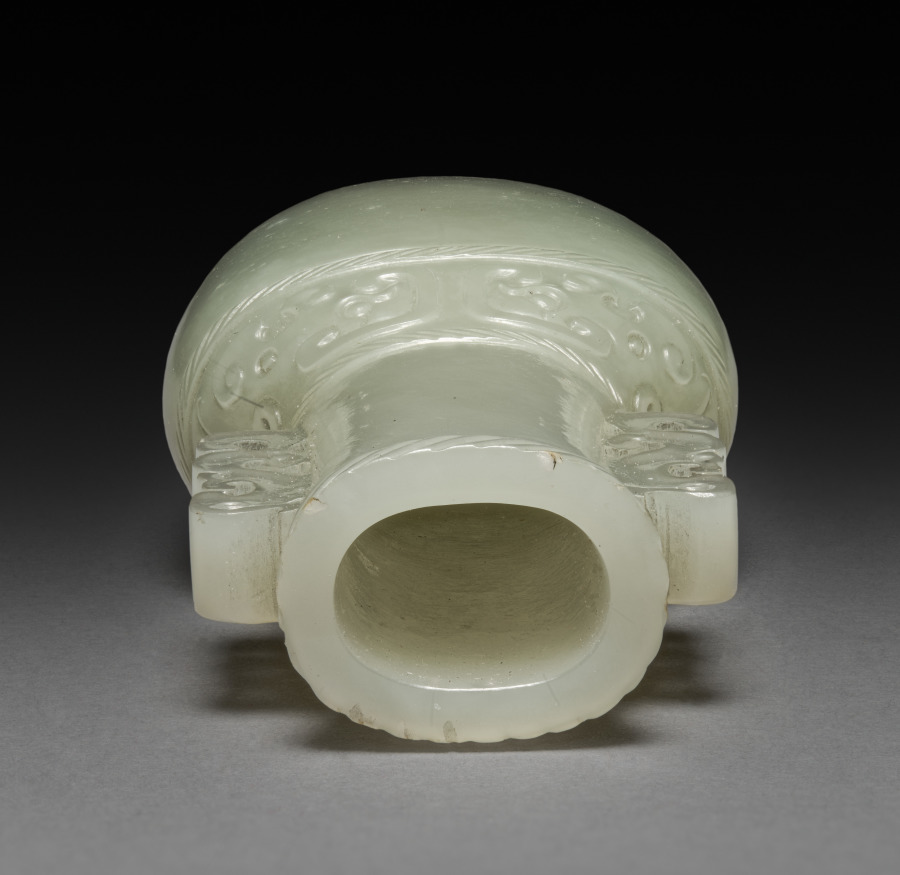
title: Bottle with Stopper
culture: China, Qing dynasty (1644–1911), Qianlong reign (1736–95)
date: 1736–95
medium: jade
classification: Jade